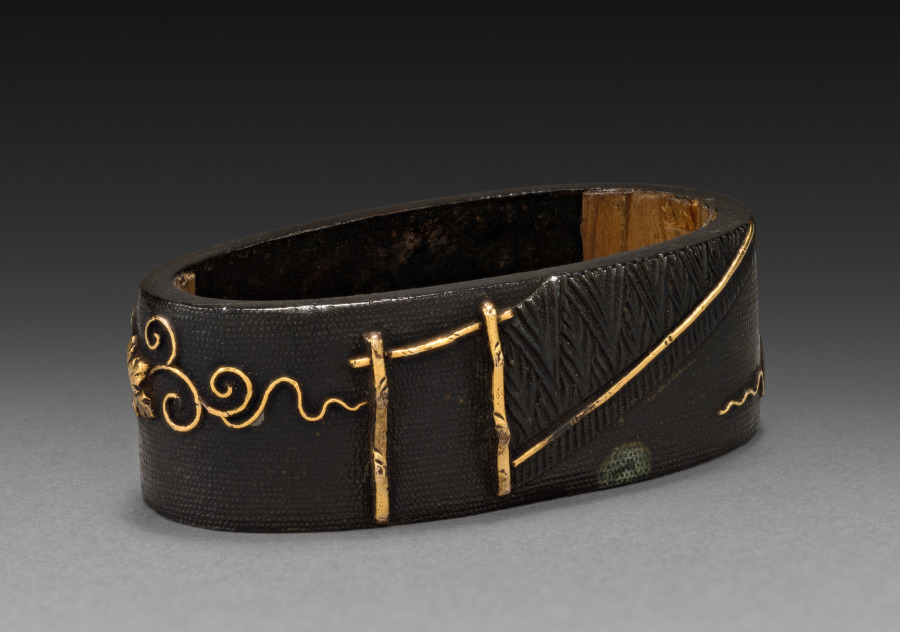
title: Sword-Hilt Collar (Fuchi)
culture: Japan, Edo period (1615–1868)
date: 1700–1850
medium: shakudo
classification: Arms and Armor